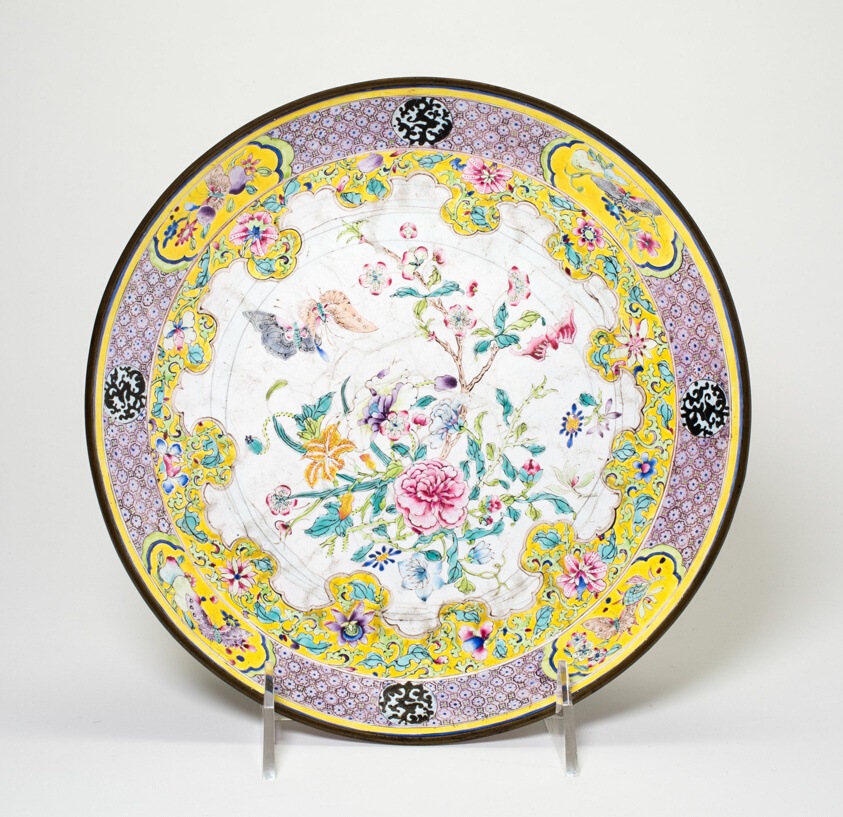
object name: Vessel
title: Dish with Butterflies and Flowers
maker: China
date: Qing Dynasty (1644–1911), Qianlong period (1736–1796)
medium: Famille-rose enamel on copper or brass base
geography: China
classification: ceramics; asian art